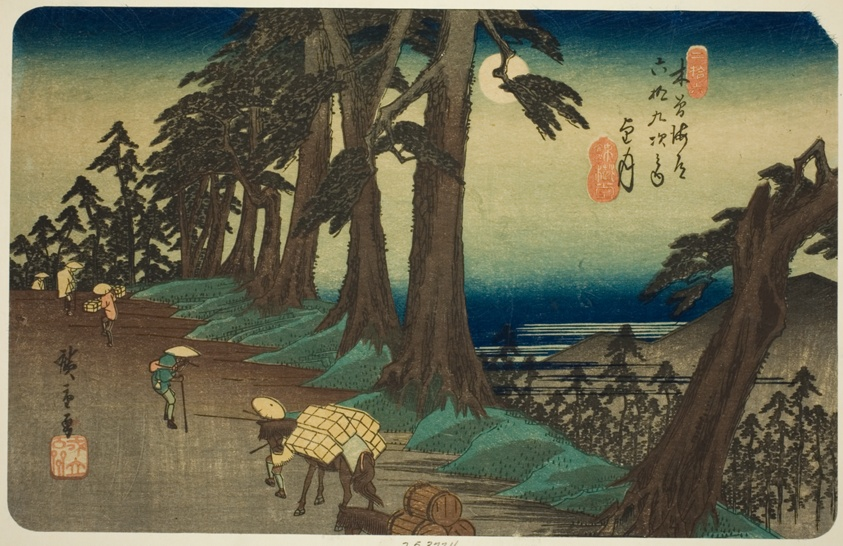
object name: Print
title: No. 26: Mochizuki, from the series "Sixty-nine Stations of the Kisokaido (Kisokaido rokujukyu tsugi no uchi)"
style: Japanese (culture or style)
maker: Utagawa Hiroshige 歌川 広重; Japanese, 1797-1858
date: c. 1835/38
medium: Color woodblock print; oban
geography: Japan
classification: woodblock print; print; asian art